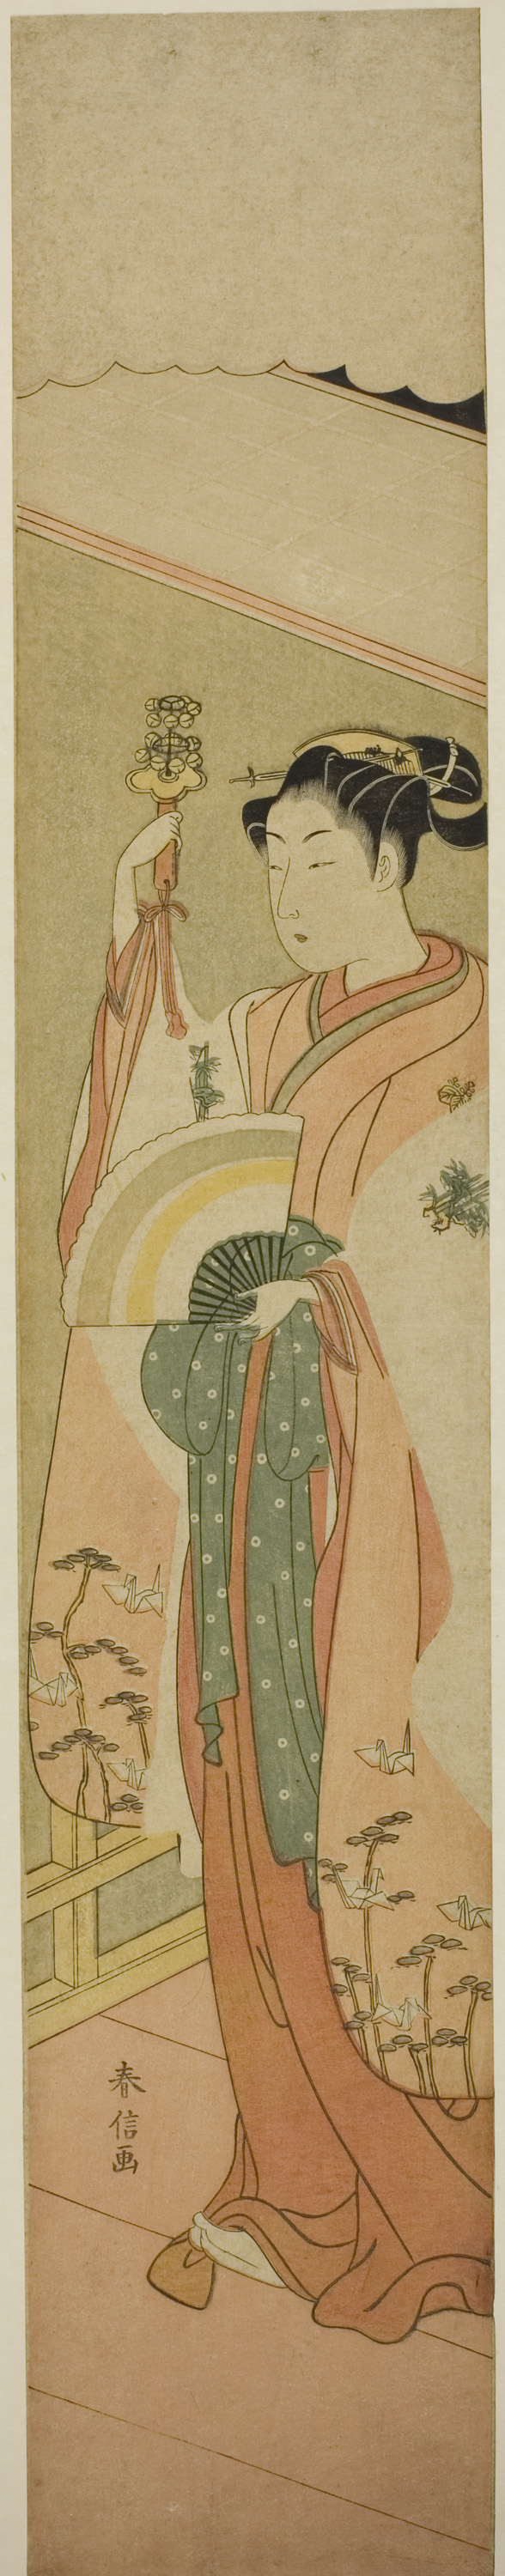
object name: Print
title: The Kagura Dance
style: Japanese (culture or style)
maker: Suzuki Harunobu 鈴木 春信; Japanese, 1725 (?)-1770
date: c. 1768/69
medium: Color woodblock print; hashira-e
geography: Japan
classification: woodblock print; print; asian art